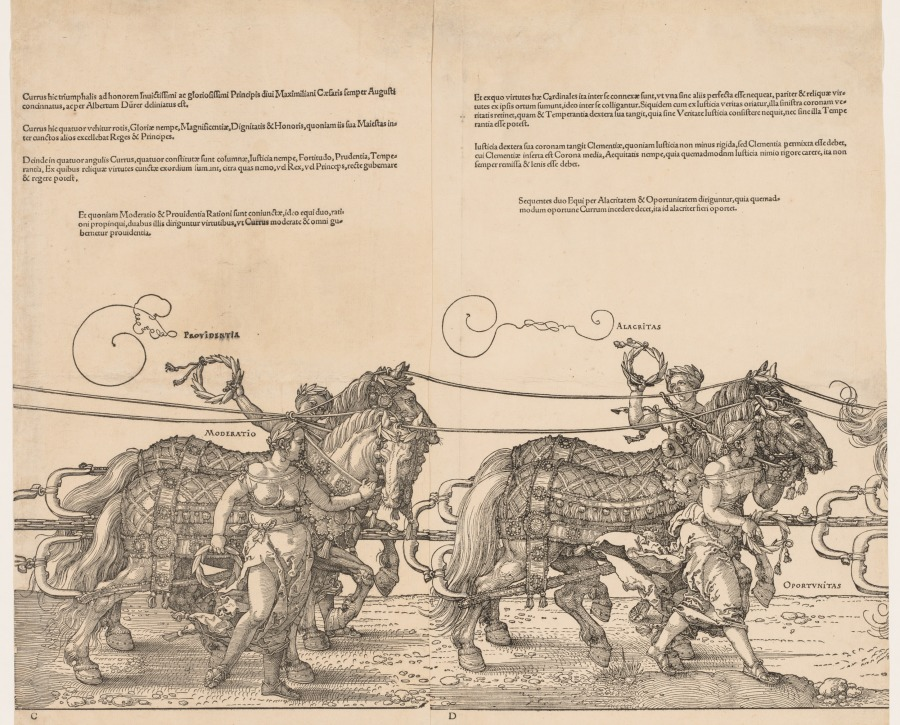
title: The Great Triumphal Car of Emperor Maximilian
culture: Germany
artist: Albrecht Dürer (German, 1471–1528)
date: 1523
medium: woodcut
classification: Print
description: Dürer conceived this fantastical chariot as part of a larger commission to depict Holy Roman Emperor Maximilian I (reigned 1486–1519) in a triumphal procession. The ruler sits enthroned in the lavish car, as Victory holds a laurel wreath above his imperial crown. Her feathered wings list Maximilian’s military campaigns. Nearly every component of the allegorical pageant—from the entourage of female attendants to the laurel garlands—has a Latin label describing honorable qualities of an ideal prince. The car rolls on wheels of Magnificence, Honor, Dignity, and Glory. Its driver is Reason, who guides a team of 12 horses with reins of Nobility and Power. Virtues of Justice, Strength, Wisdom, and Temperance, stand on pedestals arranged around the emperor. Maximilian died in 1519, before the ambitious commission could be completed. Dürer published The Great Triumphal Car at his own expense with text composed by his friend Willibald Pirckheimer (1470–1530).